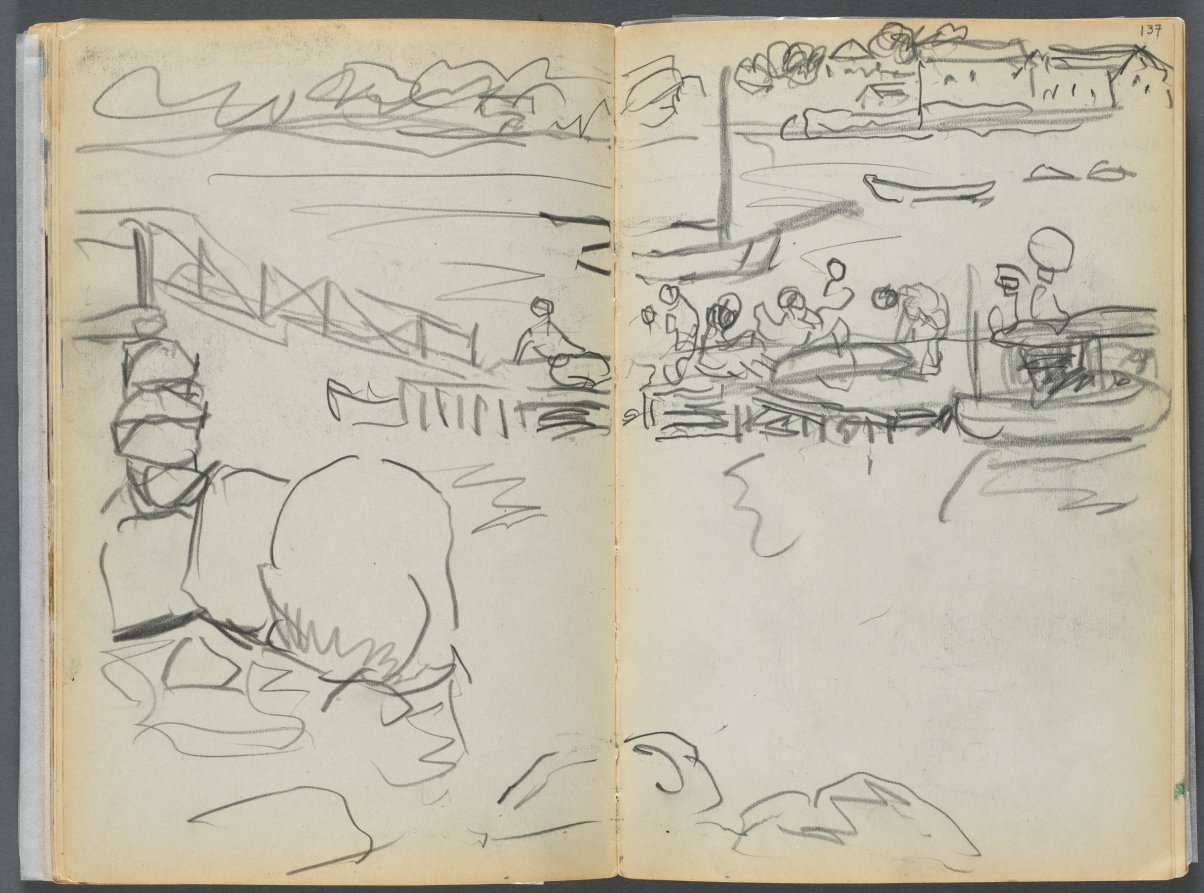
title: Sketchbook- The Granite Shore Hotel, Rockport, page 136 & 137: The Dock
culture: America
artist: Maurice Prendergast (American, born Newfoundland [now Canada], 1858–1924)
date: 1905–10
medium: graphite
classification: Bound Volume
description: This sketchbook contains 72 pages of pencil drawings and 9 watercolors of Cape Ann. On the inside of the cover Prendergast wrote the address of the Granite Shore Hotel in Rockport, Massachusetts.